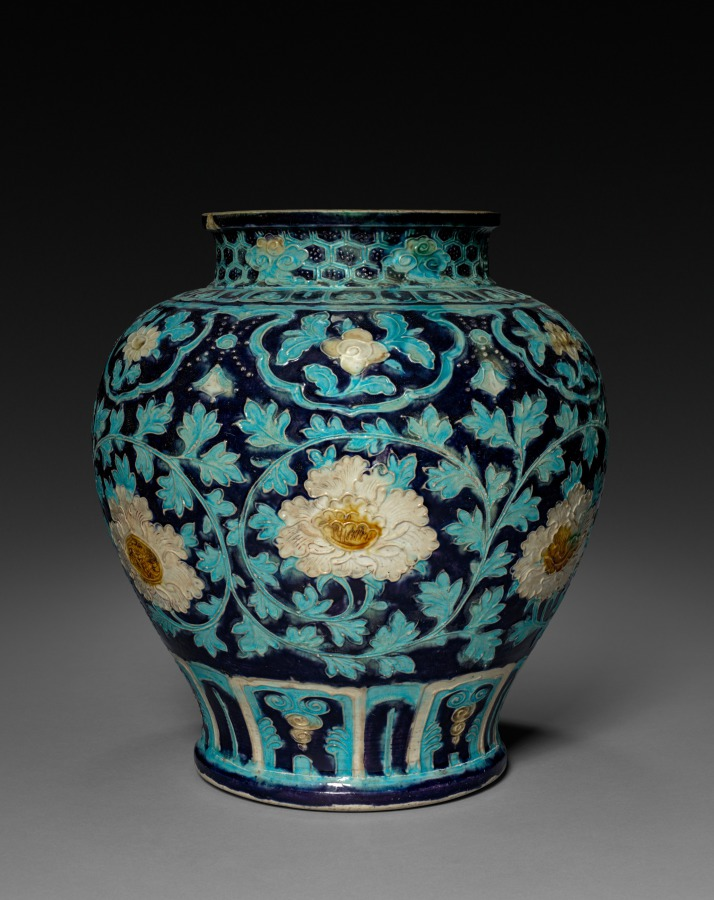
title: Jar with Chrysanthemum Decoration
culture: China, Ming dynasty (1368–1644)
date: 1368–1644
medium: porcelain, Fahua ware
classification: Ceramic